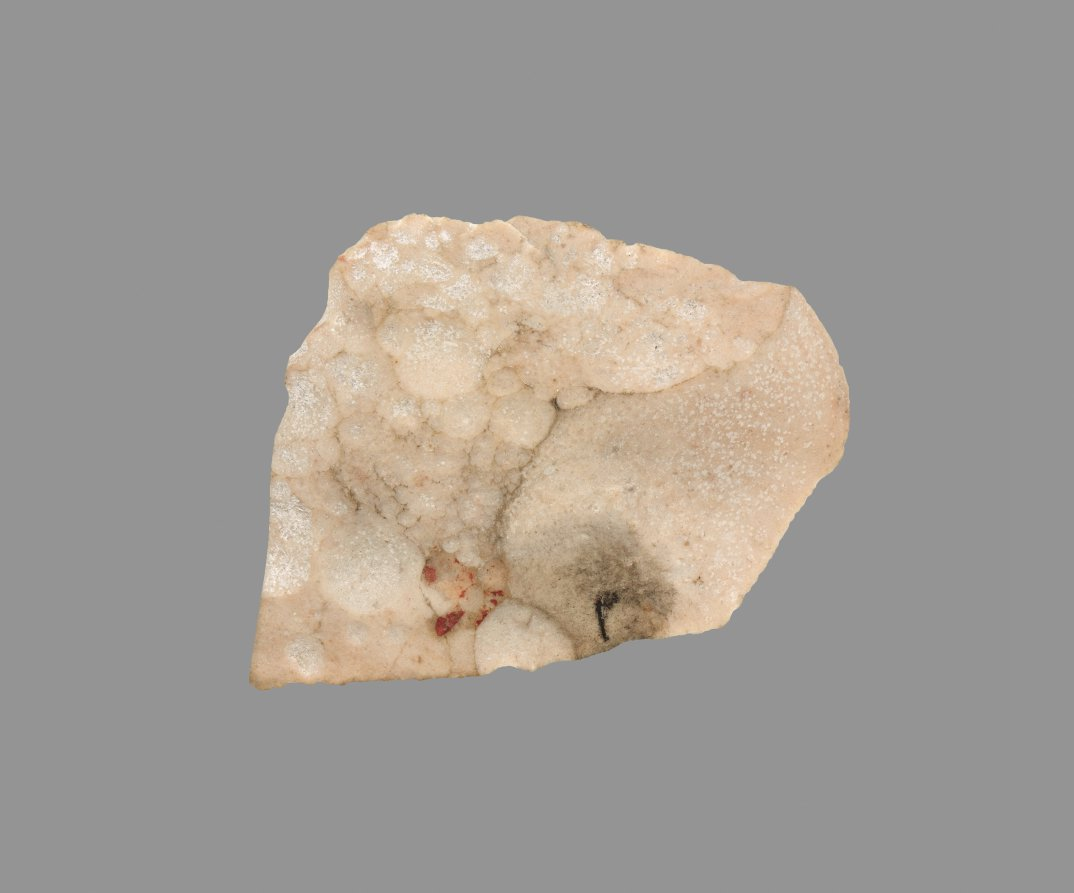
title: Sickle Blade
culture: Egypt, Middle Kingdom (2040–1648 BCE), Dynasty 12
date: 1980–1801 BCE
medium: flint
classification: Implements